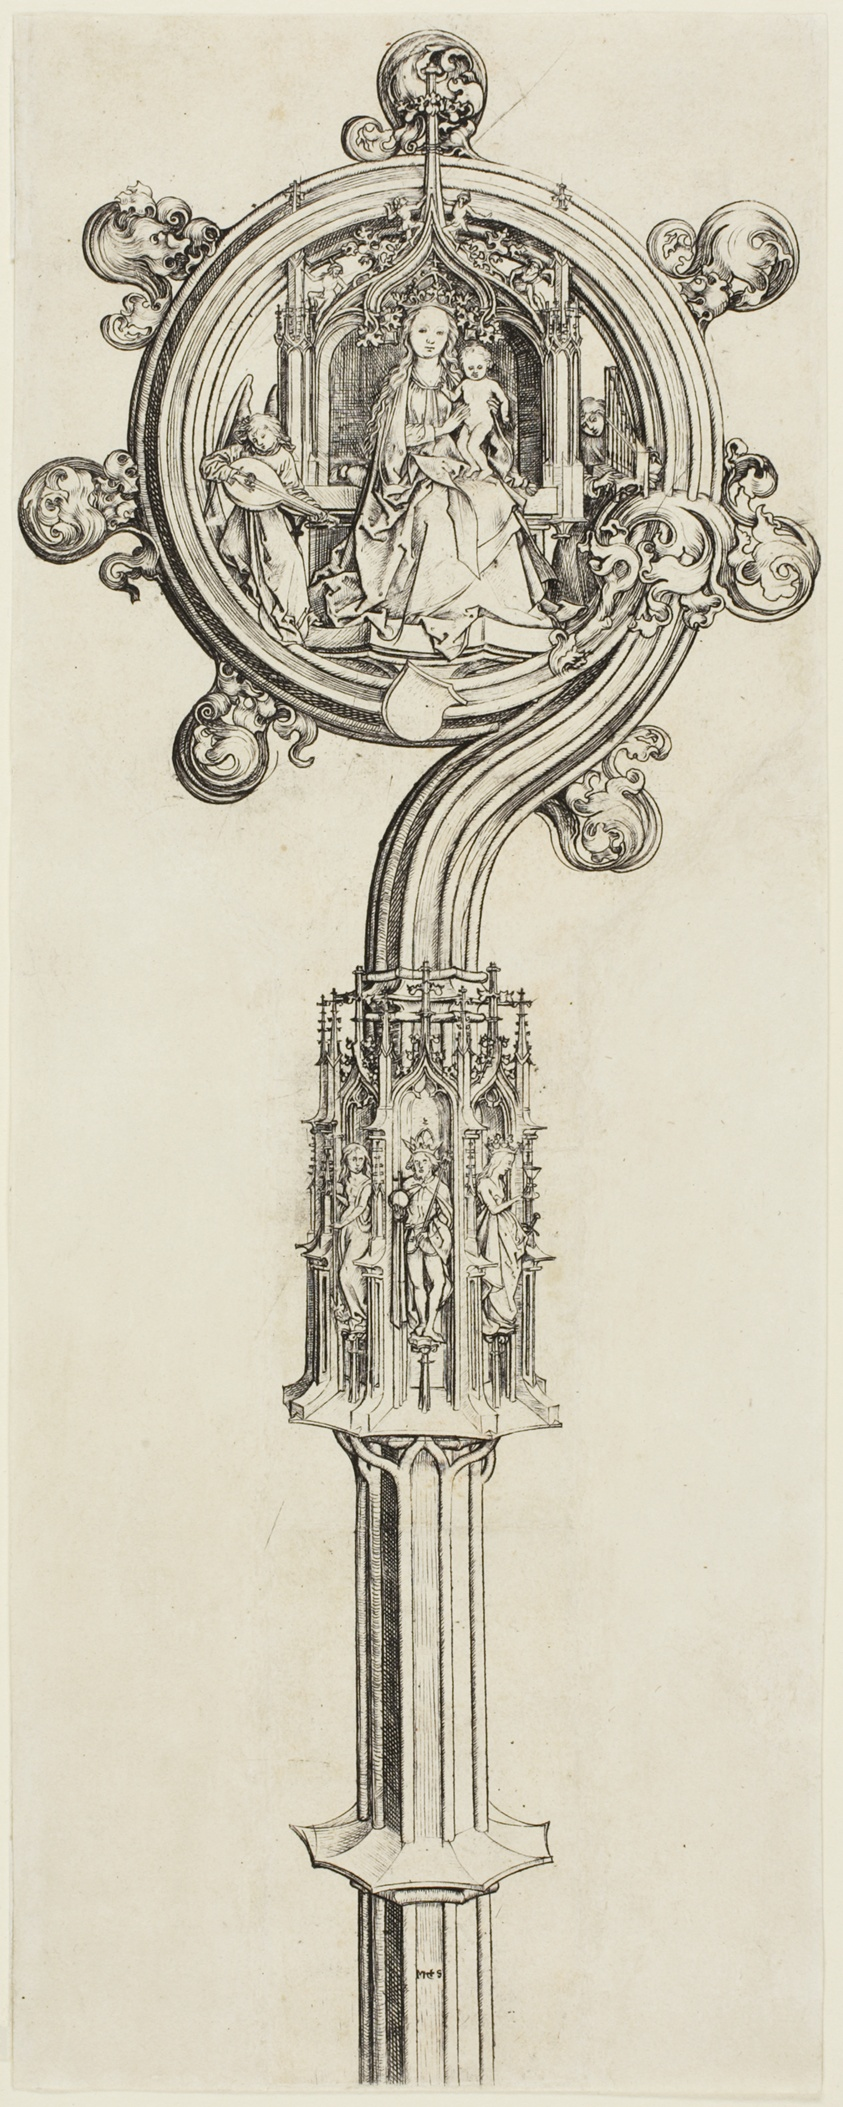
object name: Print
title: Bishop's Crosier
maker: Martin Schongauer (German, c. 1430/50-1491)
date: 1475/80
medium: Engraving on ivory laid paper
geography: Germany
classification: engraving; print; prints and drawing